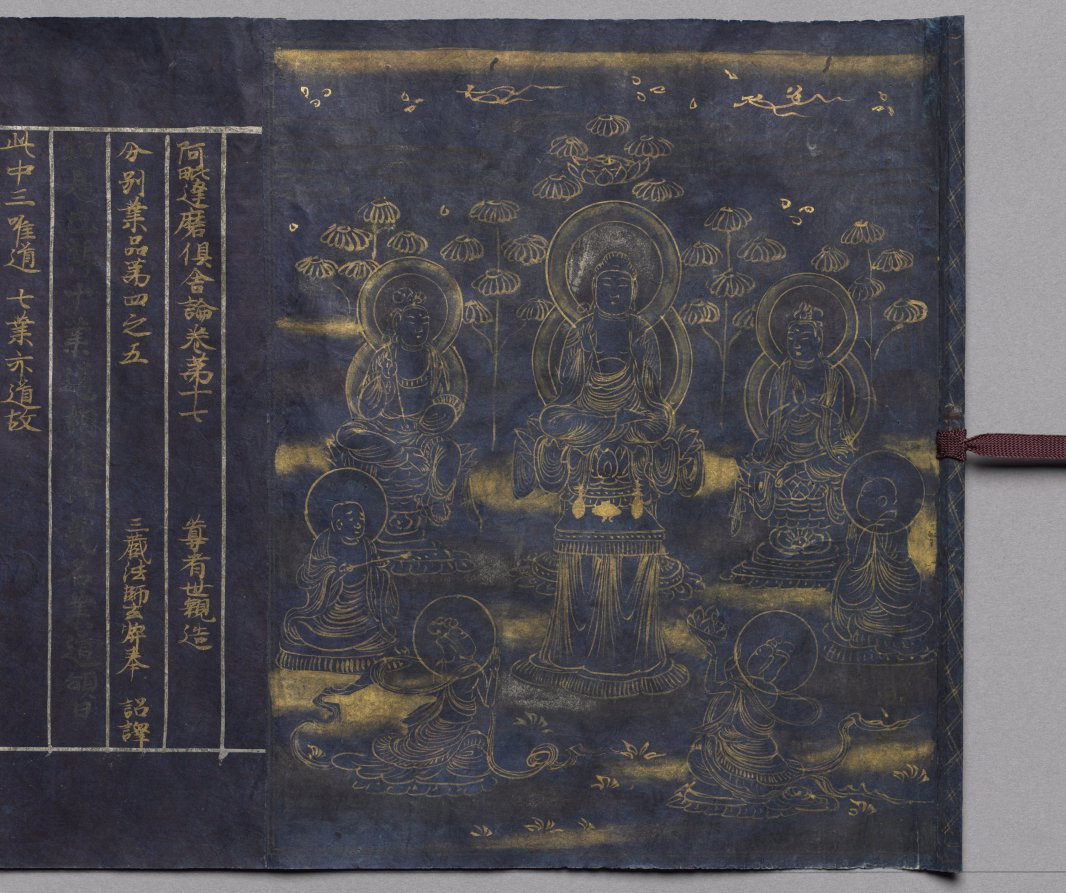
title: Meta-Discourse on the Teachings from the Treasury (Abidharmakosha-Bhashya)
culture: Japan, Heian period (794–1185)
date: 1100s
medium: handscroll; gold and silver on indigo-dyed paper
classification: Manuscript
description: This religious text relates some of the teachings of the great fourth-century Indian Buddhist scholar Vasubhandhu. The text analyzes human consciousness in its relationship to the environment and transformations that occur during meditation. This scroll is the 17th part of a 30-part translation of the text by Xuanzang, an eminent seventh-century Chinese monk.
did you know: The frontispiece depicts the Buddha Shakyamuni preaching in a paradisical landscape.